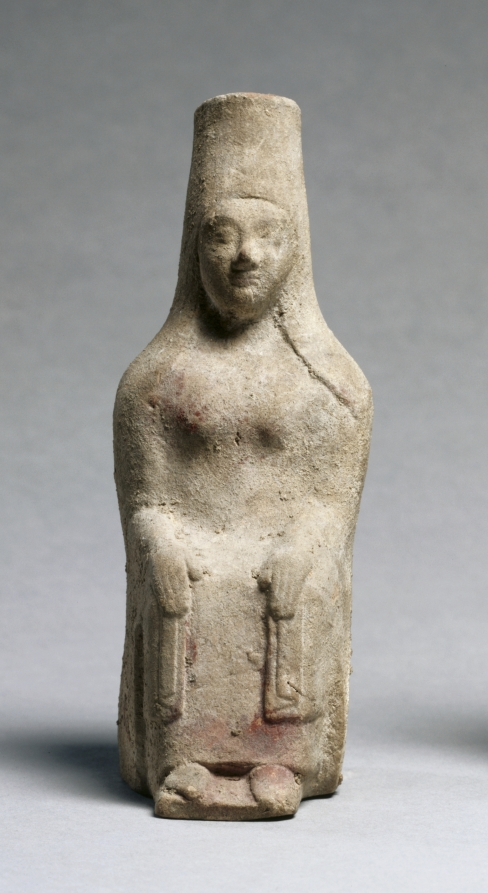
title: Seated Goddess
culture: Greece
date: 500s BCE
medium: terracotta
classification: Sculpture